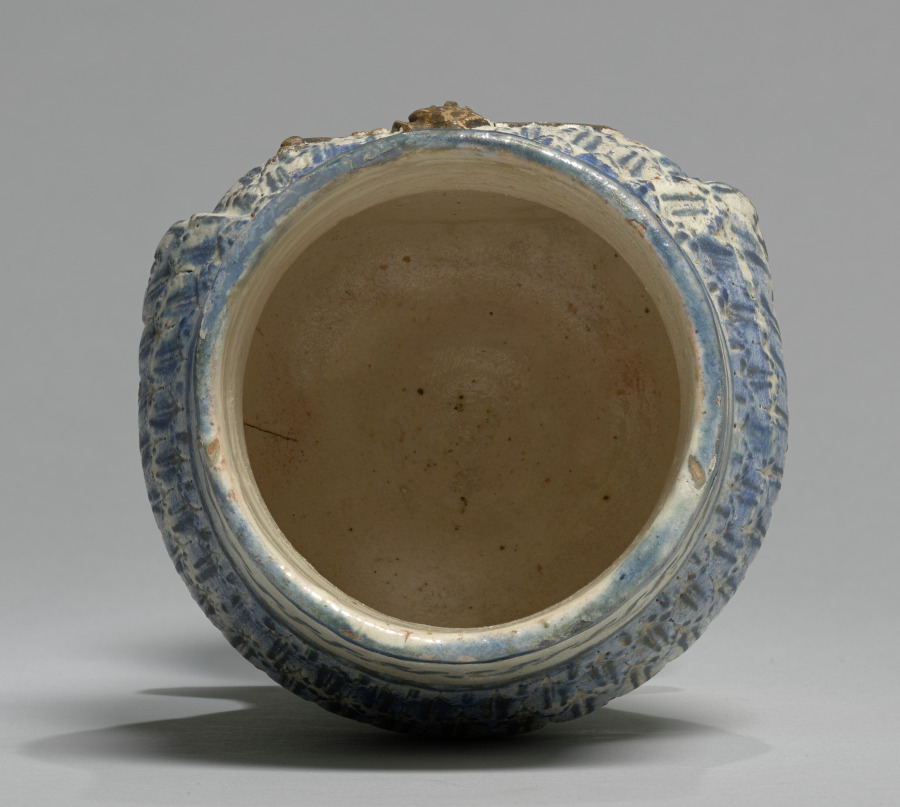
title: Owl (body)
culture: Southern Germany, 16th century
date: 1540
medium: faience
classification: Ceramic